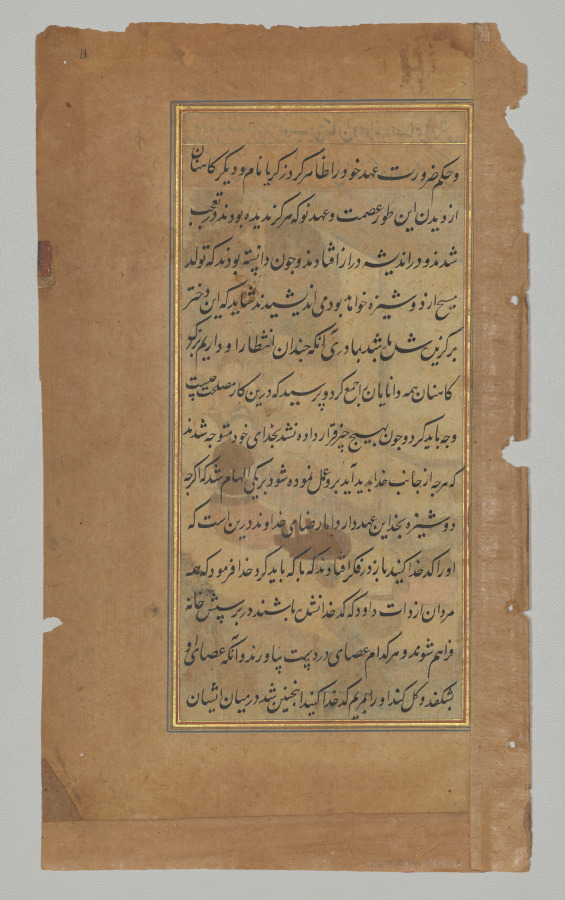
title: The Flowering of Joseph’s Rod (folio 11 verso), from a Mirror of Holiness (Mir’at al-quds) of Father Jerome Xavier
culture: Mughal India, Allahabad, made for Prince Salim (1569–1627)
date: 1602–04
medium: Gum tempera, ink, and gold on paper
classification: Manuscript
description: Joseph kneels outside the temple, among, according to the text, a group of unmarried men. The artist has depicted them dressed like contemporary Portuguese merchants wearing button-down belted shirts. The men had been ordered by God to bring their staffs to the temple; the one whose staff blossoms would become the husband of Mary. Joseph quivers with astonishment as his staff blooms; his hat falls to the ground as though it suddenly came off his head in surprise. Father Jerome’s source for this episode was the apocryphal Gospel of Pseudo-Matthew.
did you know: The suitors in this scene are dressed as contemporary Portuguese men, but have followed the Muslim practice of removing their shoes while in the temple.